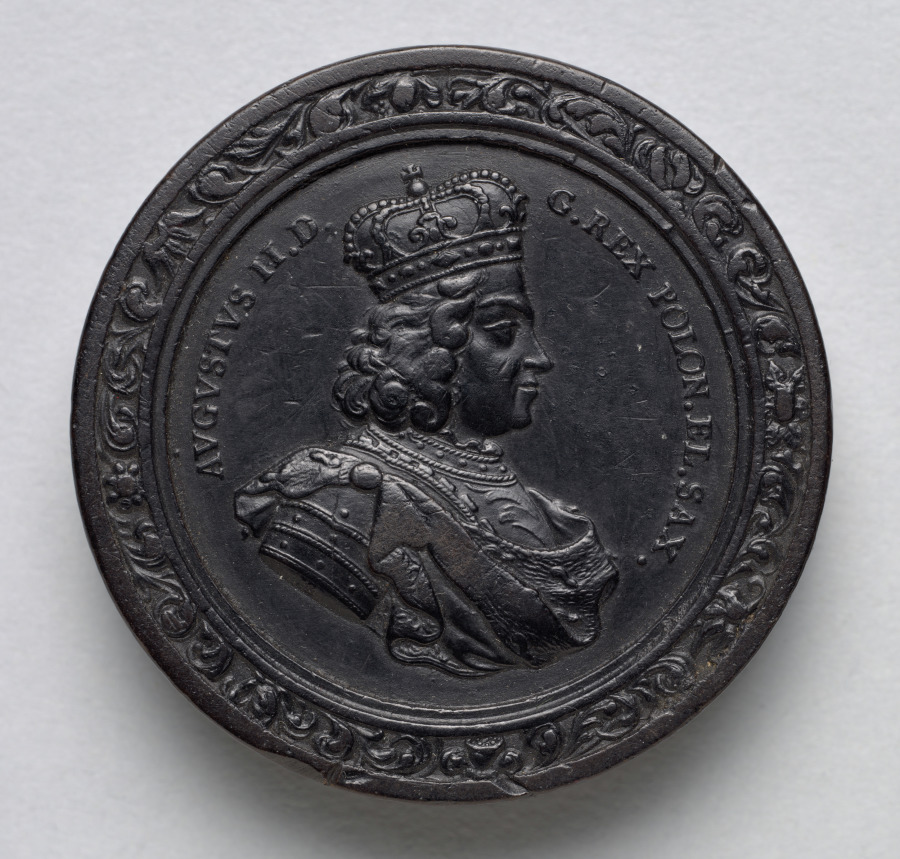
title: Gaming Piece (obverse)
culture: Germany, late 17th-early 18th Century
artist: Martin Brunner (German, 1659–1725)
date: c.1700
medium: wood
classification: Furniture and woodwork